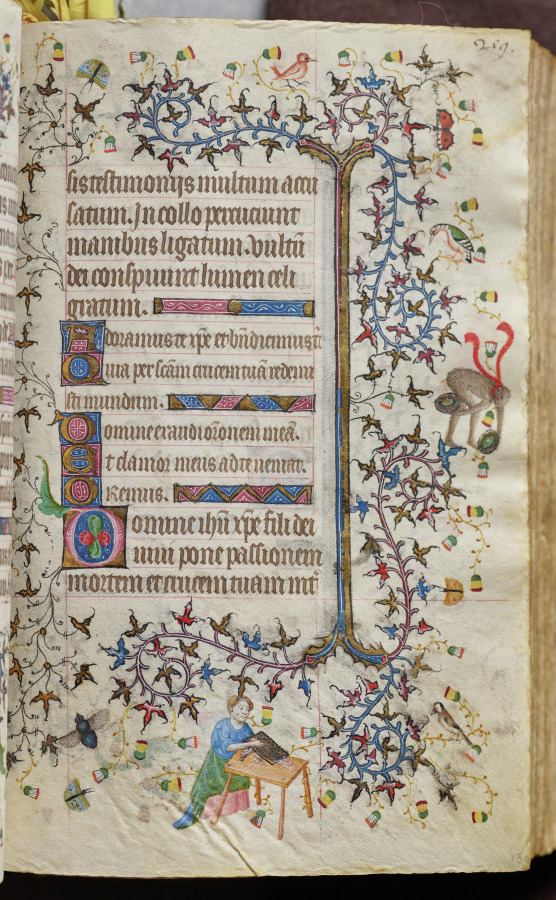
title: Hours of Charles the Noble, King of Navarre (1361-1425): fol. 130r, Text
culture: France, Paris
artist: Master of the Brussels Initials and Associates (French)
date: c. 1405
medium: ink, tempera, and gold on vellum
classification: Bound Volume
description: This precious volume was obviously highly prized by its owner, the French-born King of Navarre, who had his coat of arms painted on no less than twenty folios. Rather than directly commissioning this manuscript from a specific workshop, it seems that Charles the Noble acquired his book of hours -- perhaps ready-made for the luxury market -- while on a trip to Paris in 1404-05. A collaborative effort, six painting styles are evidenced within the pages of this codex, those of two Italians, two Frenchmen, and two Netherlanders. The painter who was responsible for the planning and decoration of the book, and who produced seventeen of the large miniatures, was a Bolognese artist known as the Master of the Brussels Initials. His principal assistant, responsible for most of the borders, was a Florentine who signed his name "Zecho" da Firenze on folio 208 verso.